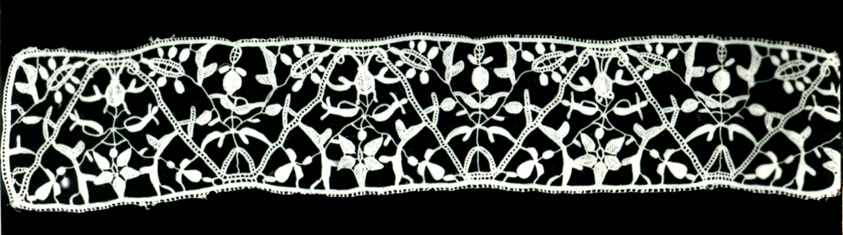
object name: Textile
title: Insertion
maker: Italy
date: 1575/1600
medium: Linen, needle lace worked on a laid and plaited thread grid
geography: Italy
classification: textile; lace - needle